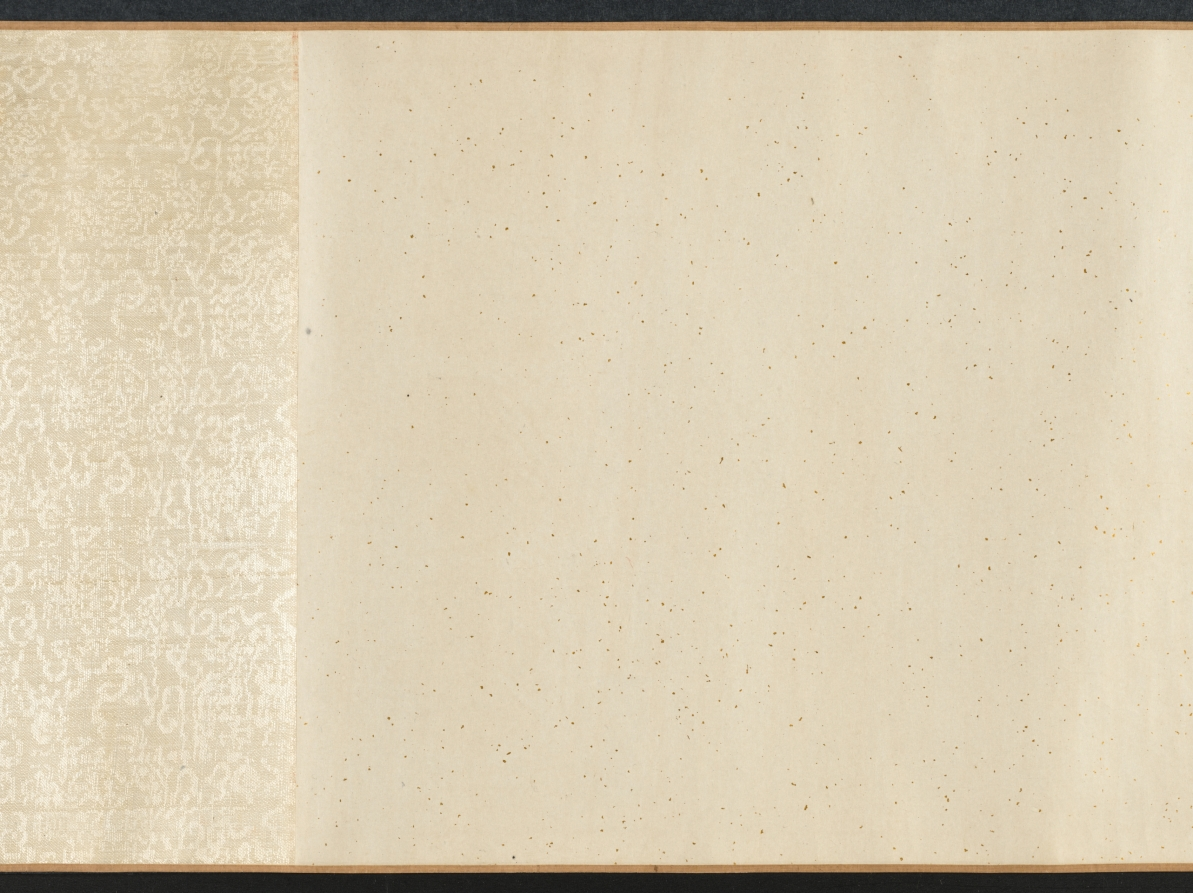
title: Landscape with Bamboo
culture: China, Yuan dynasty (1271-1368)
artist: Song Ke (Chinese, 1327–1387)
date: 1300s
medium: Handscroll; ink on paper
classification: Painting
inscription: 東吳宋克戲為仲幾畏友圖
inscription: 2 colophons and 14 additional seals: 1 seal of Yü Chung-chi (14th c.); 1 seal of Wu Ch'eng (1469 jinshi); 1 colophon and 2 seals of Wu K'uan (1435–1504); 1 colophon and 9 seals of Cheng Qi (1911–1988); 1 seal unidentified.